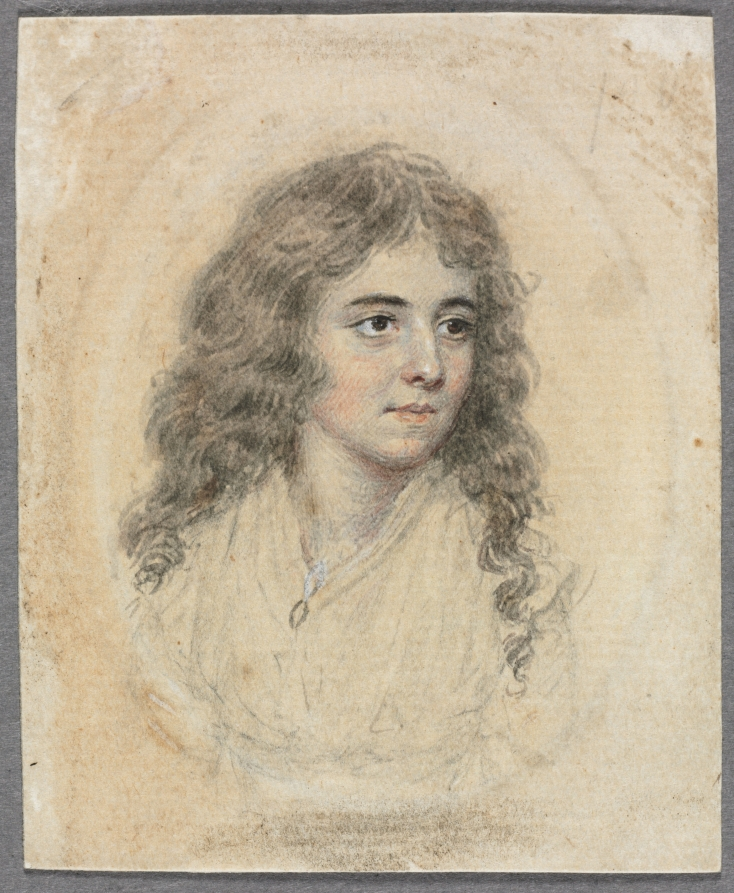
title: Portrait of Anna Maria Woolf, née Smart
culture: England, 18th century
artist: John I Smart (British, 1741–1811)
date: c. 1785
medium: graphite and wash on laid paper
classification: Portrait Miniature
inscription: Signature: none; inscribed on front of paper at upper right corner: 1[?][?]; inscribed on paper backing, in graphite at left center: Indi; upside down, at left above center: 38; inscribed in brown ink at center, on back of drawing: Mrs Peirce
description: Although it is impossible to say whether or not it was always part of the artist’s process to execute a preparatory sketch prior to painting each miniature, we do know that John Smart retained many hundreds of these sketches. A group of preparatory sketches—of which this portrait is one—descended through the Smirke family after Smart’s daughter Sarah gave a sketchbook containing preparatory portrait studies to her friend Mary Smirke, sister of the celebrated Victorian architect Sydney Smirke. This book was probably broken up around 1877 when it was divided between Sydney’s daughters Mary Jemmett and Mrs. Lange, whose portions were both sold at auction in 1928. This portrait was assigned the historically colorful but fictitious title of “Duchess Christina” at some point after memory of its true identity had been lost. Giving illustrious titles to portraits of unknown sitters was a popular strategy adopted by dealers during the nineteenth and twentieth centuries, often applied to miniature portraits and, in particular, to Smart’s sketches of women. Here, the sitter’s head is turned slightly to her left. She has dark brown eyes, rosy cheeks, and long, wavy dark hair falling below her shoulders. She wears a white dress with long sleeves and a ruffled bodice, and a small lozenge-shaped pendant around her neck. She is placed inside a faintly suggested oval, and the background is unpainted. The paper backing—removed in 1993—was inscribed with “38” and “Indi,” which may suggest that the sketch was executed during Smart’s time in India. The inscription that was discovered on the back of the drawing after the paper backing was removed reads, “Mrs [or perhaps Miss] Peirce.” Although the inscription appears to be in the artist’s hand, and in the brown ink he used to annotate his preparatory sketches, its relationship to this portrait is unclear. The sitter is probably Anna Maria, Smart’s eldest daughter by his first wife, whose name is unknown. Anna Maria (1766–1813) traveled with her father to India in 1785, sailing from England on April 19 and arriving in Madras on September 6. If the work was executed in India at the time Anna Maria accompanied her father there, the sketch may be dated to around 1785, the year they moved to the subcontinent. Anna Maria would have been around 18 years old. The fact that this portrait is of an older girl who dons a plain, modest dress and wears her hair down suggests an intimacy not found in the type of portraits Smart commonly executed of women wearing fine gowns and elaborately dressed hair.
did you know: After living in India for many years, Anna Maria was en route to England when she was forced to disembark at St. Helena to give birth to her son.